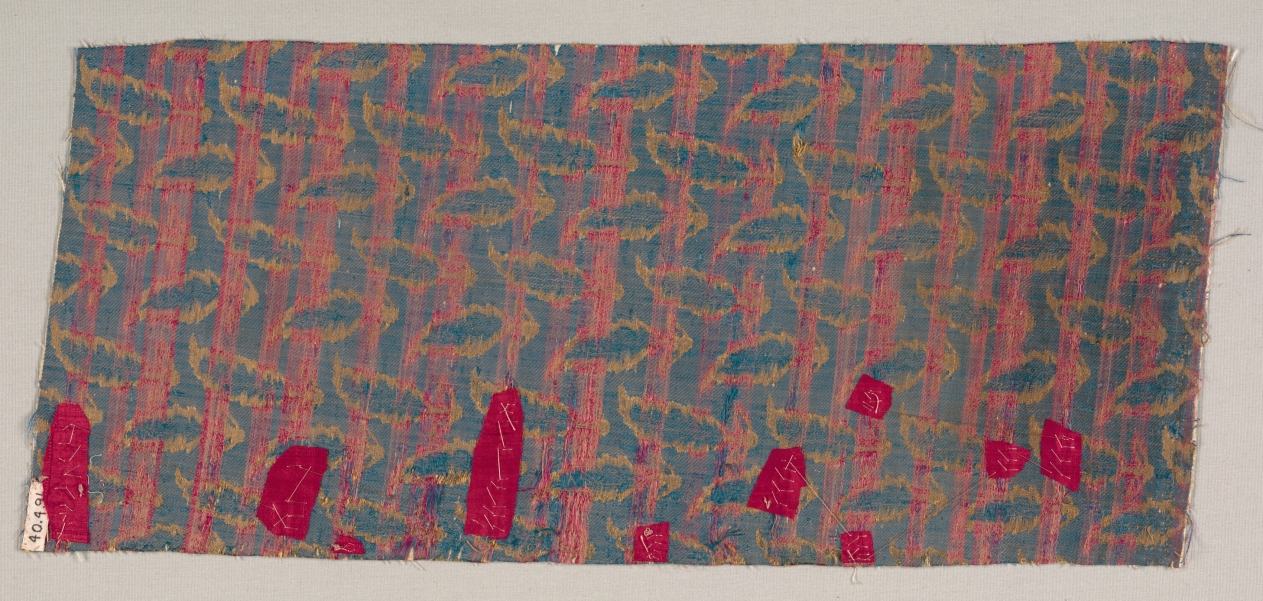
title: Textile Fragment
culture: Turkey, Anatolia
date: 17th century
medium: brocaded silk with metal thread weft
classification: Textile